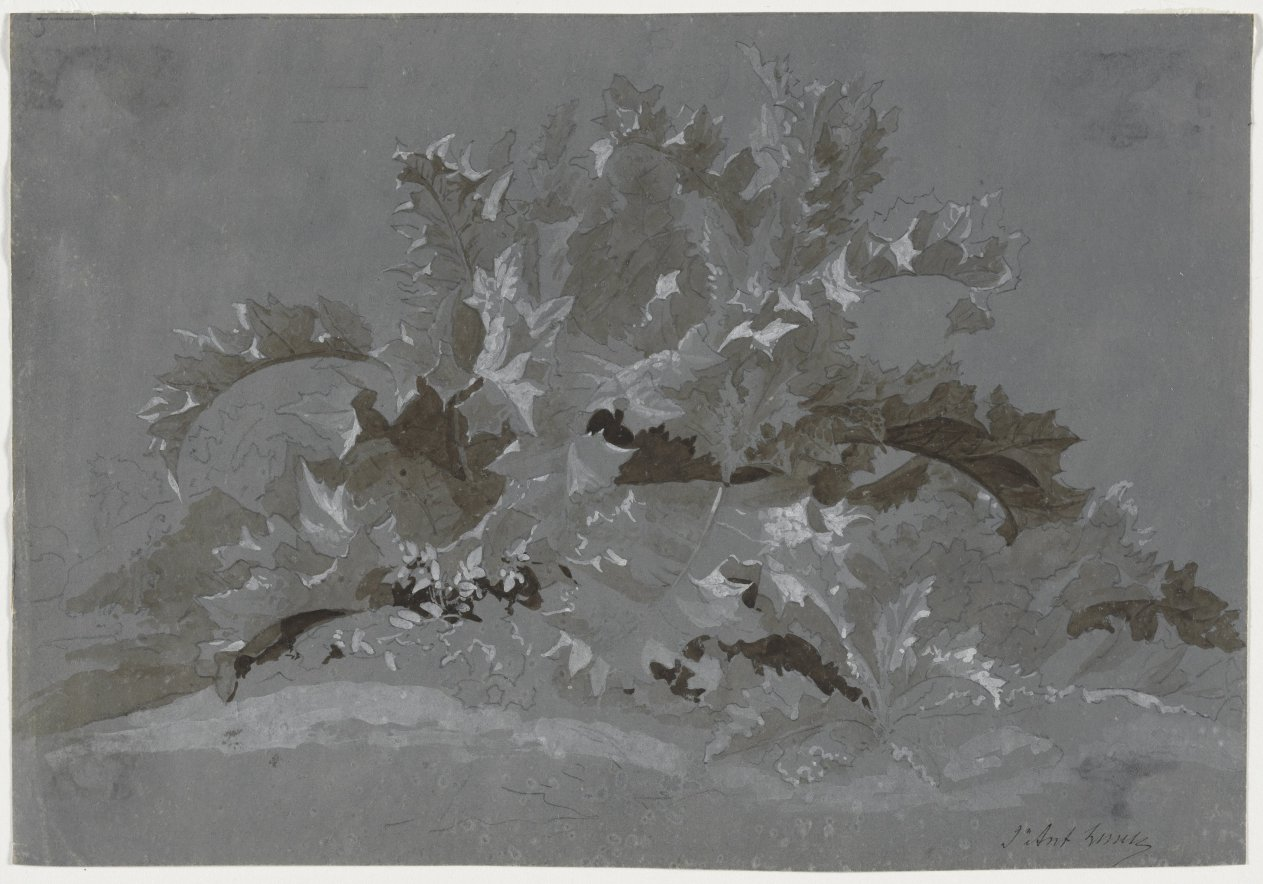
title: Study of Weeds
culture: Switzerland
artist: Jean Antoine Linck (Swiss, 1766–1843)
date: 1800–1850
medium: brush and gray, black and white gouache over graphite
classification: Drawing